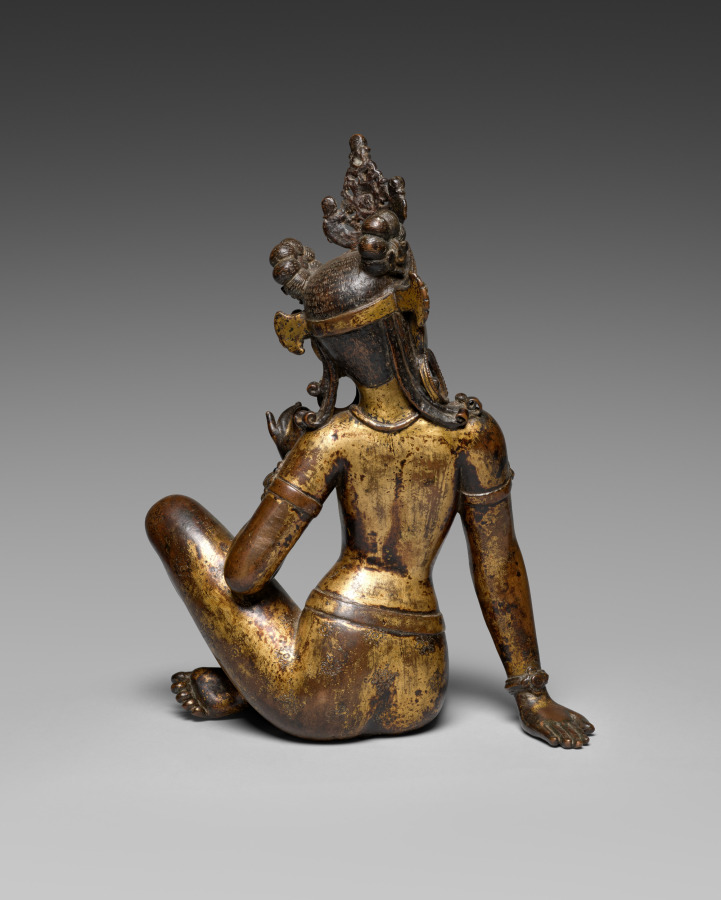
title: Goddess Uma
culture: Nepal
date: 1000s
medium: gilt bronze and semiprecious stones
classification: Sculpture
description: Uma is a mother goddess, and she is depicted here as turning toward her consort, the Hindu god Shiva, a companion sculpture from which this image of Uma has been separated. The grace and femininity of this solid-cast figure are balanced by her confident gesture and expression. She embodies the creative energy of god and the beauty of his creation. In Nepal, Hinduism and Buddhism have continued to flourish simultaneously, in contrast to Tibet, which is predominantly Buddhist, and India, where Buddhism was no longer practiced after the 14th century.